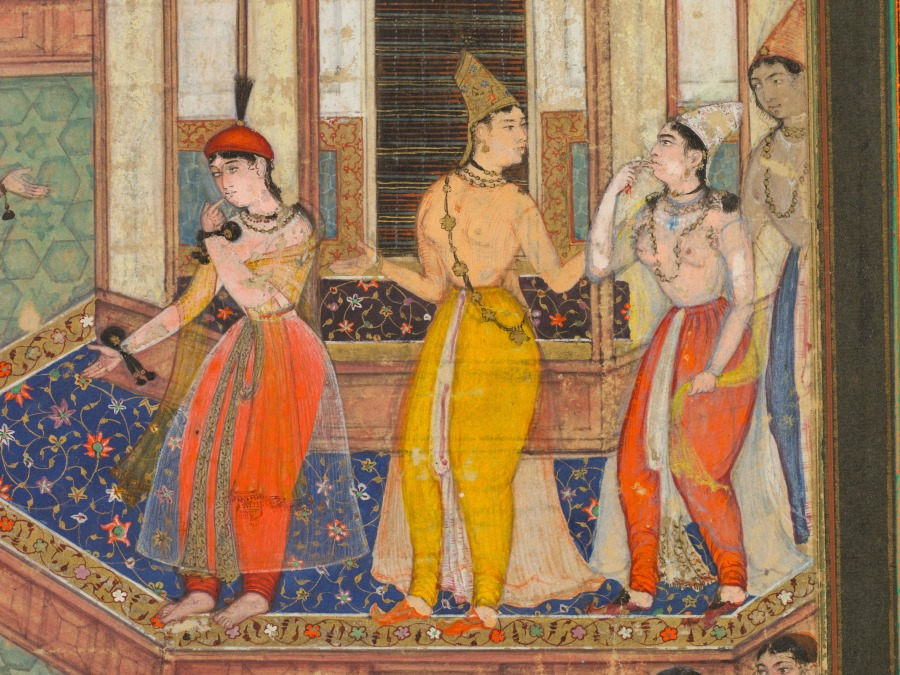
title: A Man Dips His Hand into a Cauldron as Ladies of the Harem Stand in Amazement: A Page from a Manuscript of Religious History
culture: Mughal India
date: c. 1600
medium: Gum tempera and gold on paper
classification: Painting